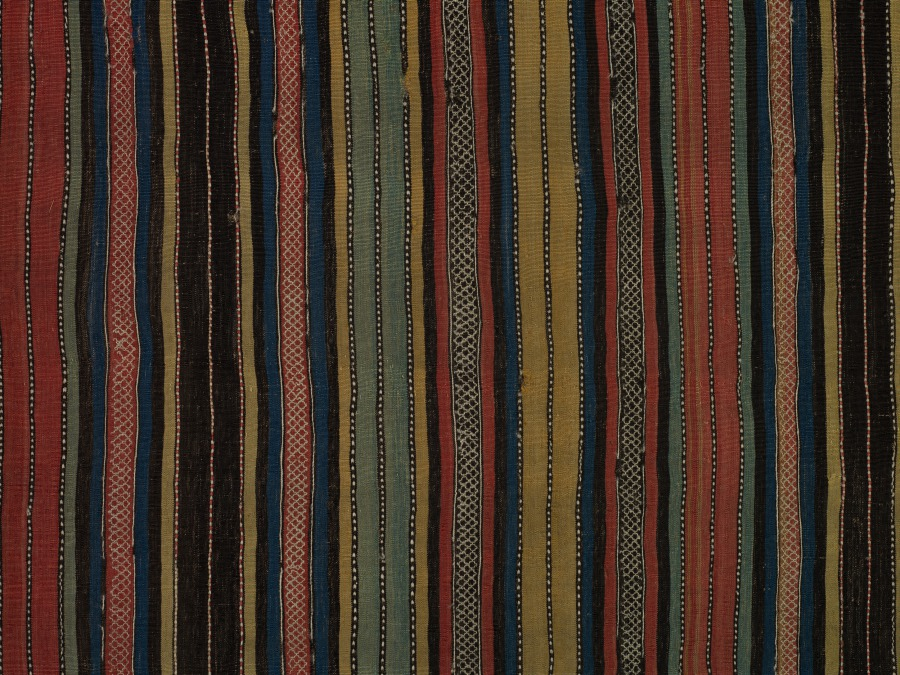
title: Blanket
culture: Tibet ?, 19th century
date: 19th century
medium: weft faced plain weave with supplementary weft: wool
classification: Textile